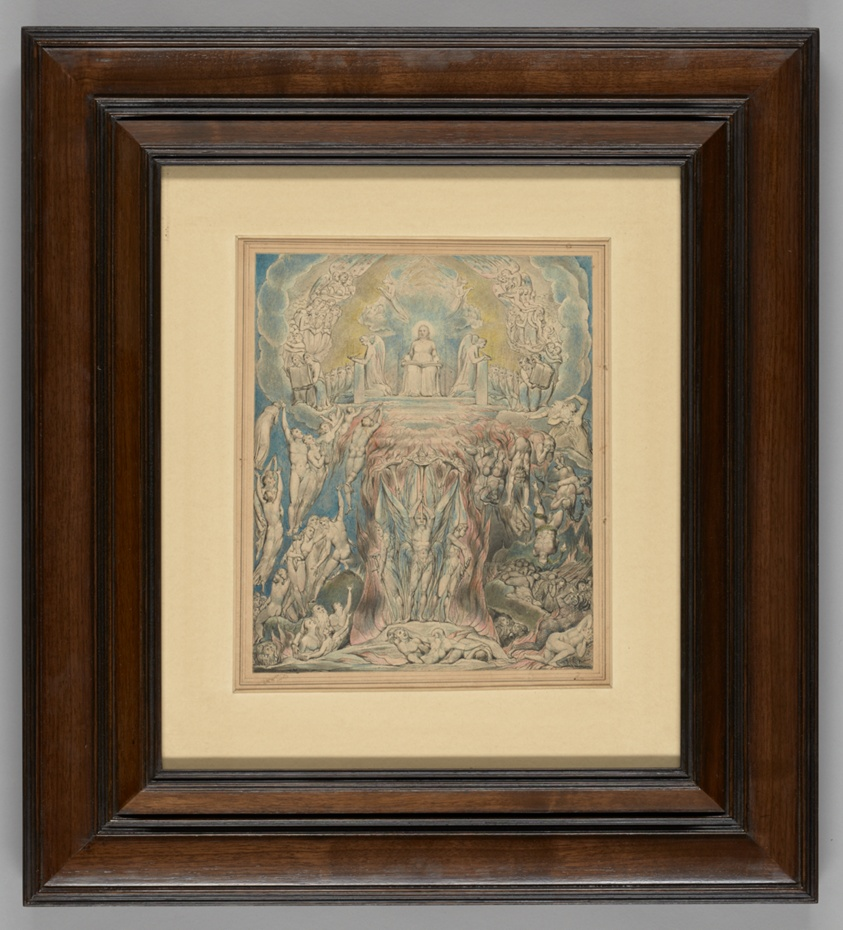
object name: Drawing and Watercolor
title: The Day of Judgment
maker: William Blake (English, 1757-1827)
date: 1805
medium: Pen and gray and black inks and watercolor, with scraping, over graphite, on cream wove paper, laid down on tan board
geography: England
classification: drawings (visual works); graphite; watercolor; pen and ink drawings; paper; prints and drawing